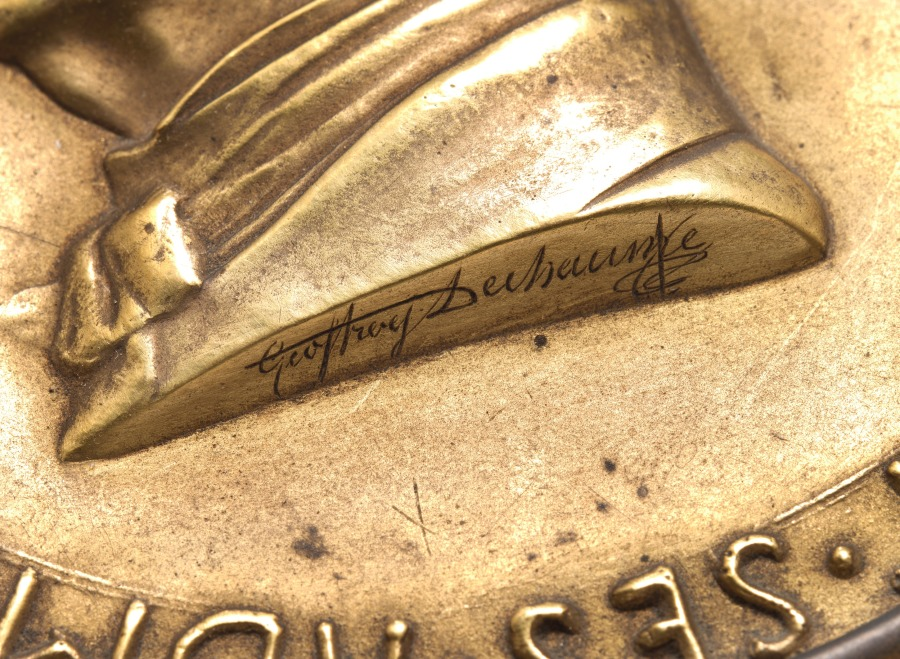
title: Medal of Corot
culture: France, 19th century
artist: Adolphe-Victor Geoffroy-Dechaume (French, 1816–1892)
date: 1874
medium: gilt bronze, wood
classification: Sculpture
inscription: Signed on cut of neck in ligature: "Geoffroy Dechaume". Obverse inscribed: "A.COROT.SES.CONFRERES.ET.SES.ADMIRATEURS.IVIN.1874". Reverse inscribed: "TEMOIGNAGE.D'ADMIRATION.POUR.SON.OEUVRE.1822-1874.